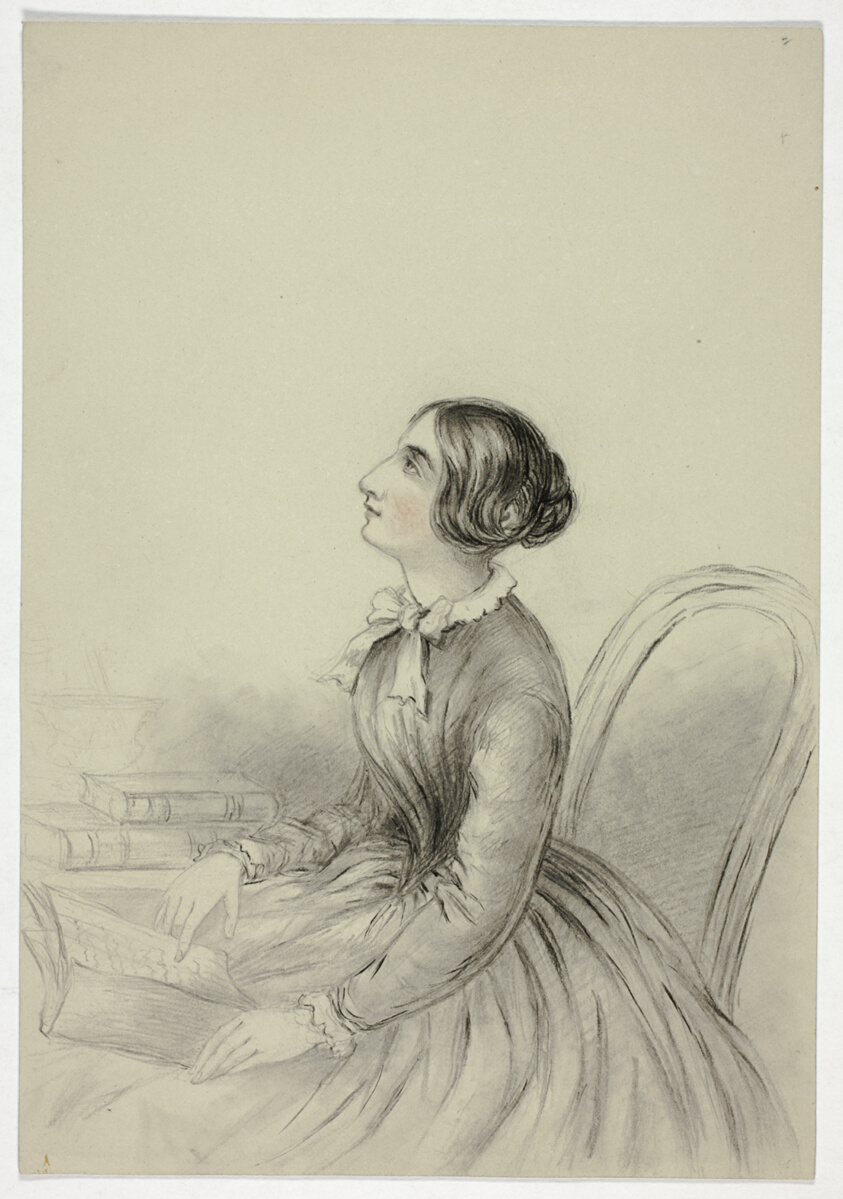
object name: Drawing and Watercolor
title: Young Woman Inspired While Reading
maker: Elizabeth Murray (English, c. 1815-1882)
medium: Black and red chalk on gray wove paper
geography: England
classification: chalk; drawings (visual works); prints and drawing